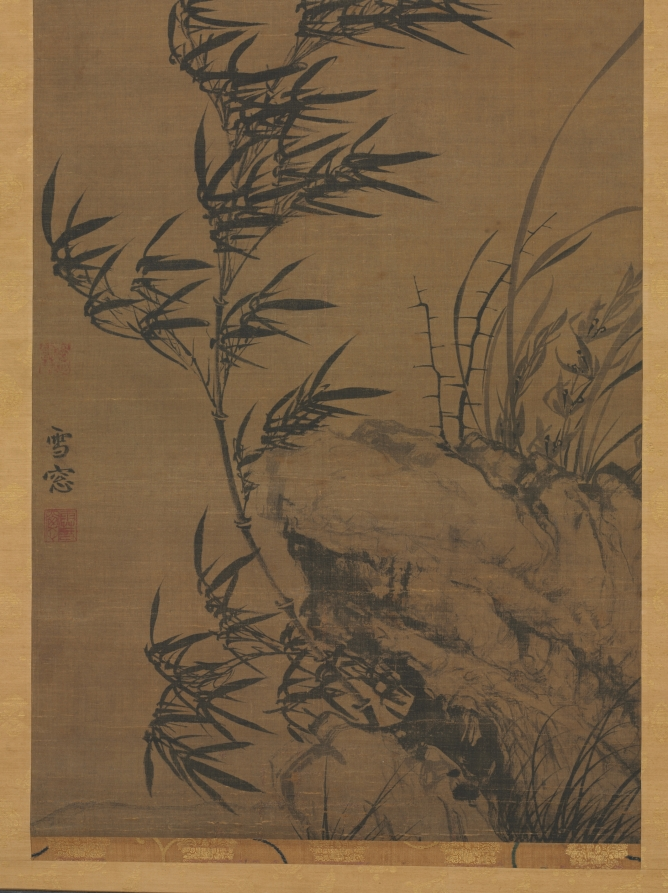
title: Bamboo in the Wind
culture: China, Yuan dynasty (1271-1368)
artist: Puming (Xuechuang) (Chinese, active before 1274-after 1329)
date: 1300s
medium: Hanging scroll; ink on silk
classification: Painting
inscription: Artist's signature and 2 seals, all reading: Xuechuang 雪窓.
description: Bamboo is an evergreen plant that does not break under the weight of snow or the force of the wind, and thus became a favorite motif in literati painting and Chan Buddhism as a metaphor for the virtue of not yielding to worldly temptations. Xuechuang, also known as monk Puming, was a native of Songjiang, near Shanghai, who spent his life as a monk in Suzhou. In 1338, he presided over Yunyan temple on Tiger Hill. Here, he masterfully depicts a bamboo gently bent in a subtle breeze. Puming’s paintings were revered in Japan and Korea.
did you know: Bamboo, pine, and plum, often referred to as the "three friends of winter," are popular motifs in Chinese literati art.